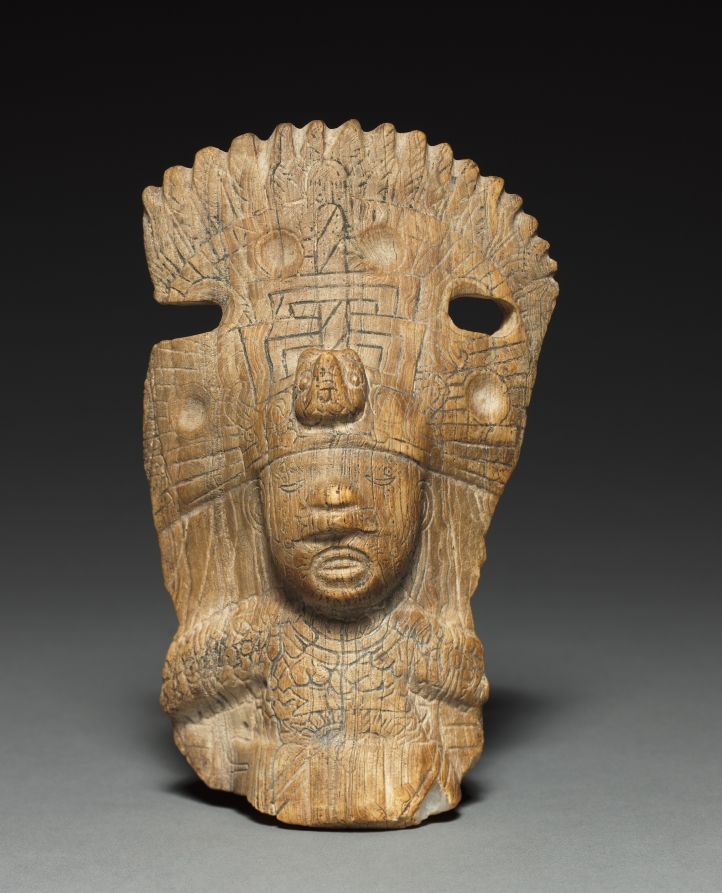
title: Vessel Fragment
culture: Mexico, Aztec style, 20th century (?)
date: 20th Century?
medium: banded travertine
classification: Sculpture